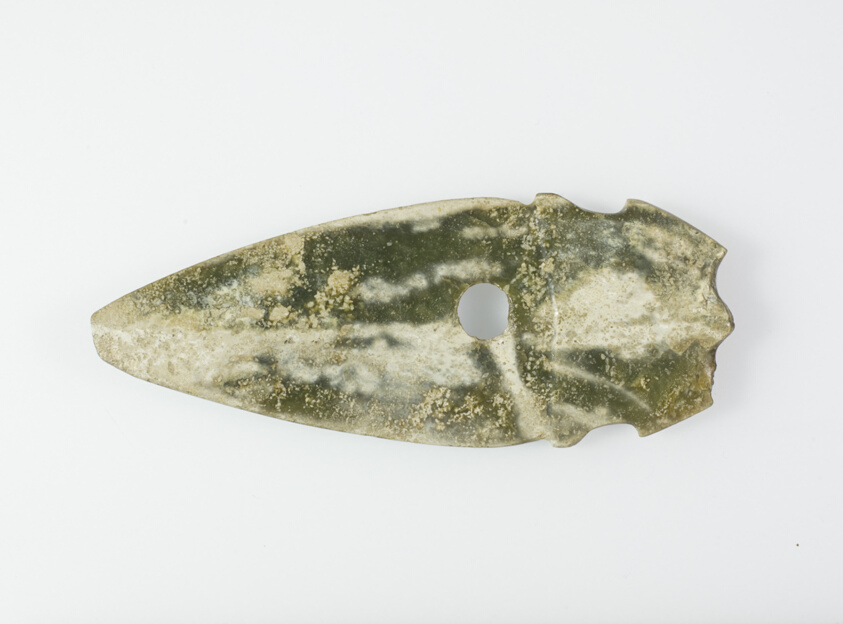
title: Pendant, cicada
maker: China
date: Shang dynasty (c. 1600–1050BC)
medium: Jade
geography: China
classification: jade; asian art